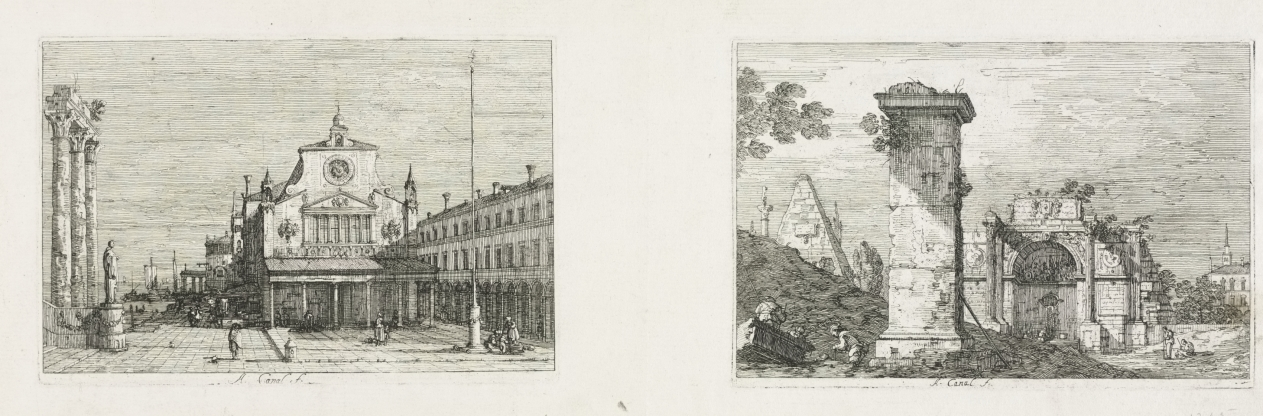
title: Views: Three Columns and a Statue on the Sea Coast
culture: Italy, Venice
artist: Antonio Canaletto (Italian, 1697–1768)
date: 1735–1746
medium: etching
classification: Print